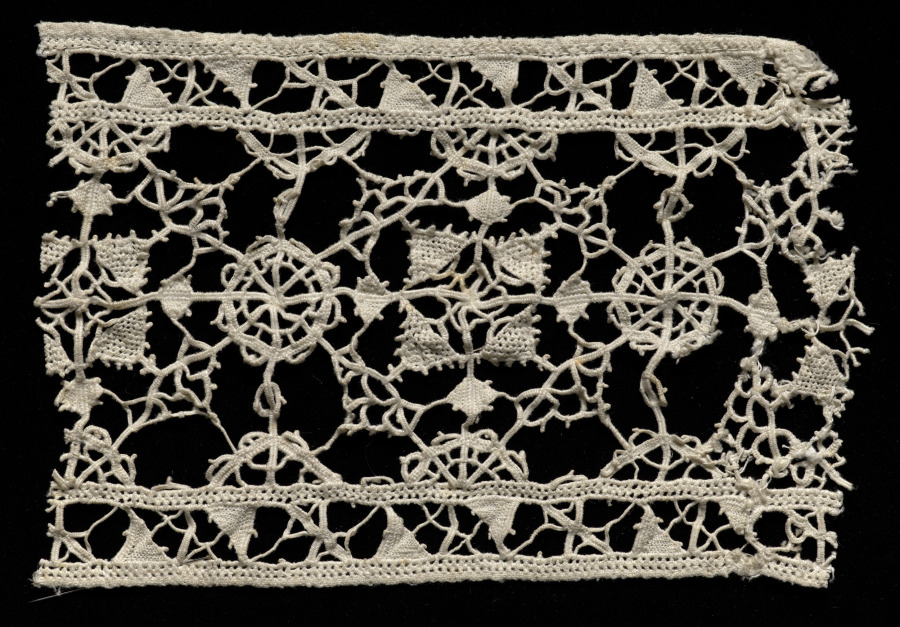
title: Lace Fragment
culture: Italy, 1800s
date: 1800s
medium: Linen: needle lace (Reticella) insertion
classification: Lace